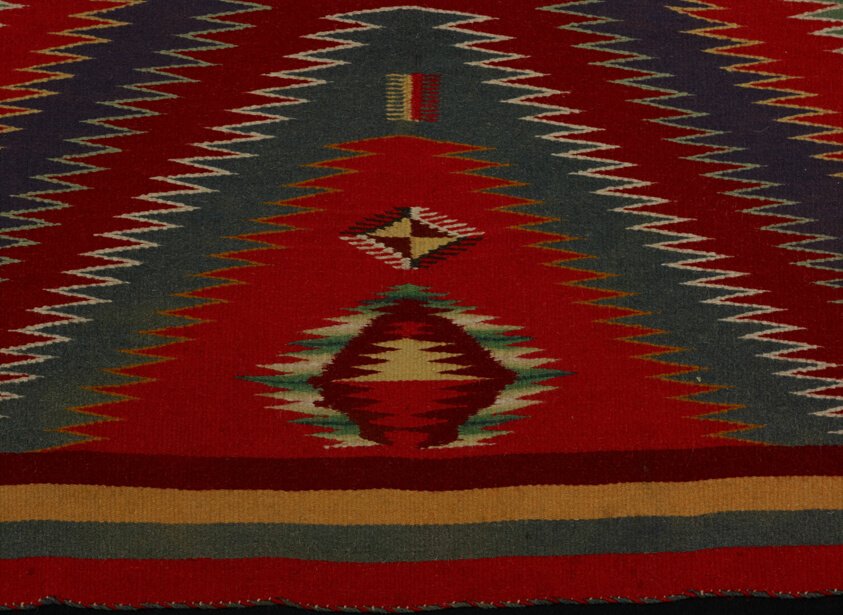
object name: Textile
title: "Eye-Dazzler" Weaving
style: navajo, native american, americas, Folk Art, 19th century, indigenous, north american, native north american, eye-dazzler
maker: Navajo (Diné) (Arizona, New Mexico, and Utah, United States)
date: 1880/1900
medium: Cotton and wool, single interlocking tapestry weave; twined selvages and heading, overcast finish terminating in tassels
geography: Navajo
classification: textile; weaving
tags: geometric, zigzags